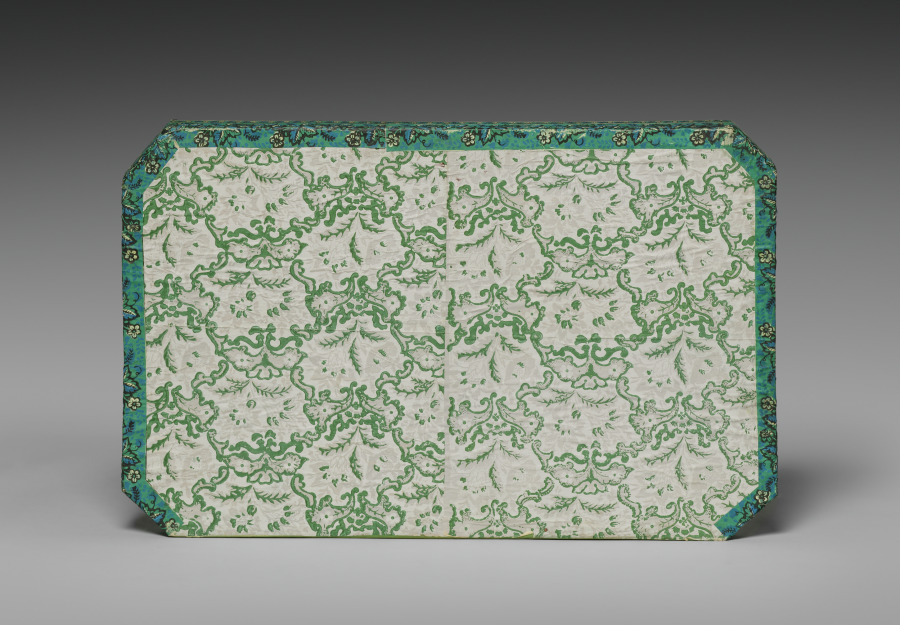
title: Chest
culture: Italy, Venice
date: 1700s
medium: leather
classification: Miscellaneous